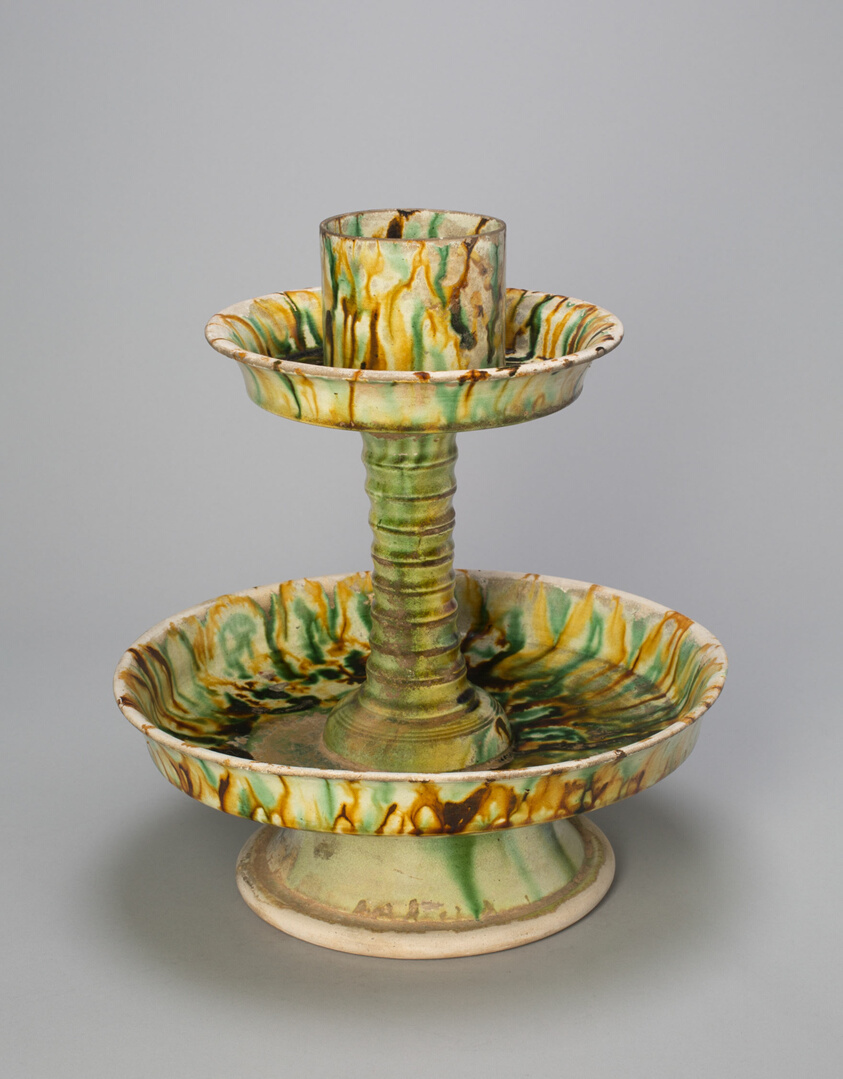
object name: Vessel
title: Candle Stand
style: Chinese (culture or style)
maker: China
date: Tang dynasty (618–907), first half of 8th century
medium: Slip-coated earthenware with three-color (sancai) lead glazes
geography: China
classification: candleholder; ceramics; asian art; earthenware; vessel